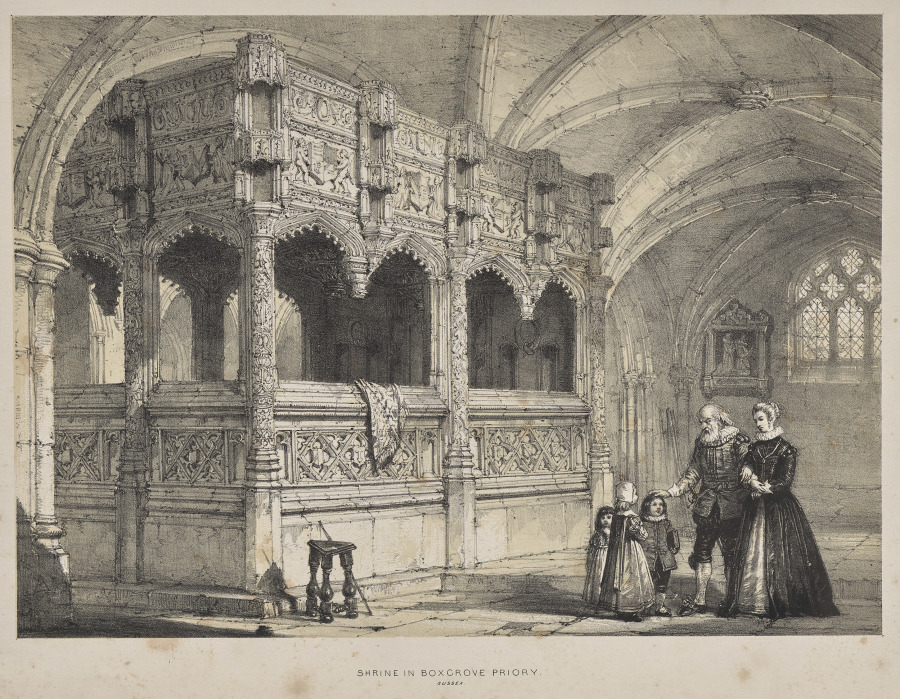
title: Architecture of the Middle Ages: Shrine of the Countess de la Warre in Boxgrove Priory, Sussex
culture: England, 19th century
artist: Joseph Nash (British, 1808–1878)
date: 1838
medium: lithograph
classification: Print